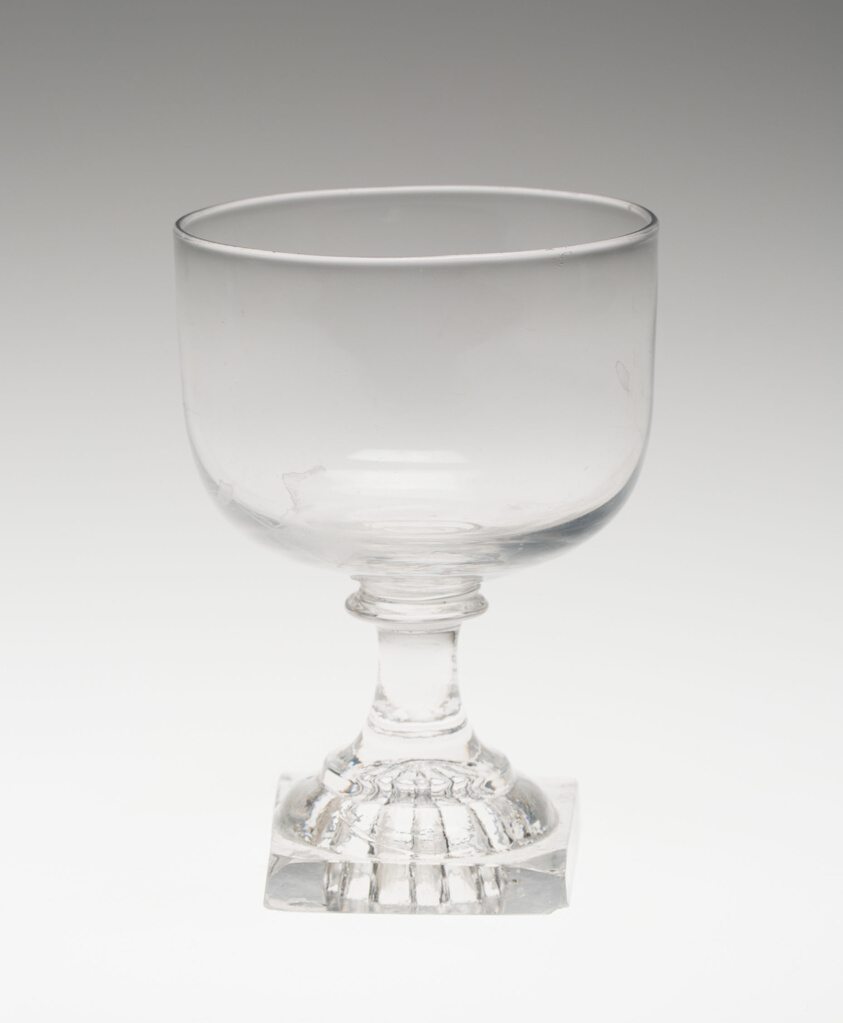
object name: Glass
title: Rummer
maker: England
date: c. 1800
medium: Glass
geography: England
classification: glass